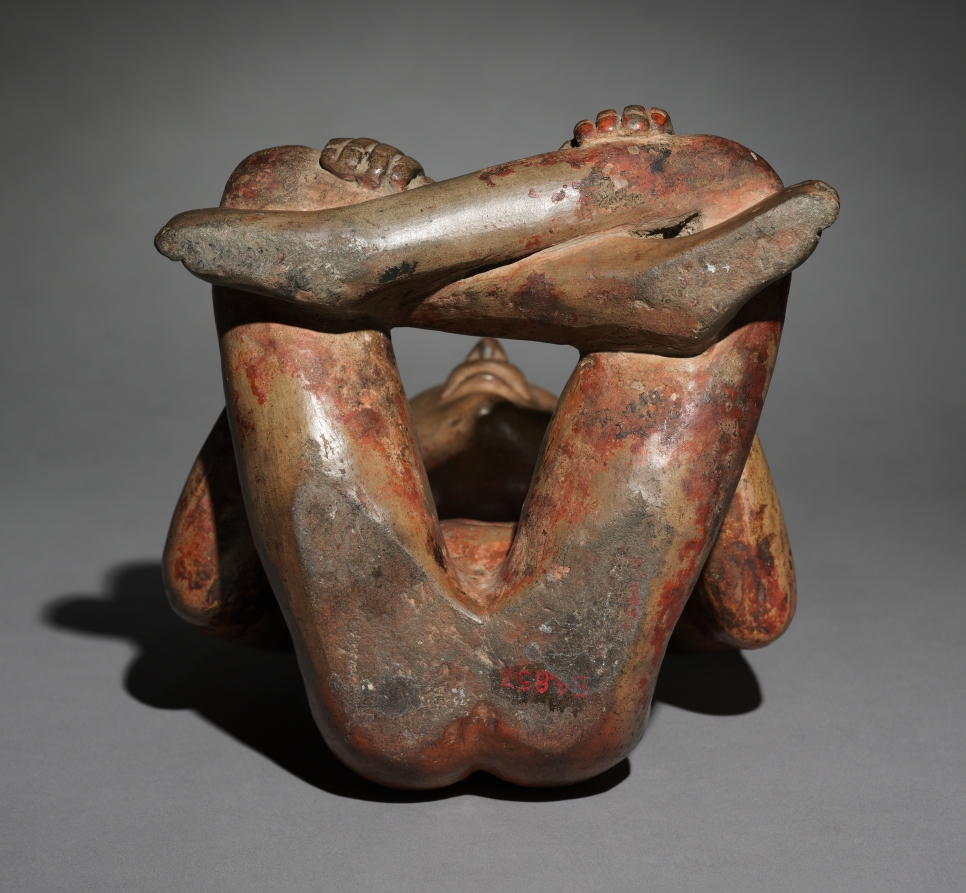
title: Seated Figure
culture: Mexico, Oaxaca, Zapotec style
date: 300 BCE–700 CE (thermoluminescence date, 285 BCE–515 CE)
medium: ceramic, slip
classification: Sculpture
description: The most famous Zapotec tomb ceramics are elaborate figural urns flanked by smaller, simpler companions similar to this one. Like other companions, this example probably belonged to a set of nearly identical figures; two others remain in Mexico. The identity of ceramic tomb figures-whether elite humans, royal ancestors, or deities-is still debated. The Zapotec developed one of Mesoamerica’s earliest writing systems, evidenced by the hieroglyphs on the headdress and chest. These are the names of calendar days, "13 Water" and "13 Flint Knife," respectively. Because people were named after the day on which they were born, one hieroglyph may identify the figure.